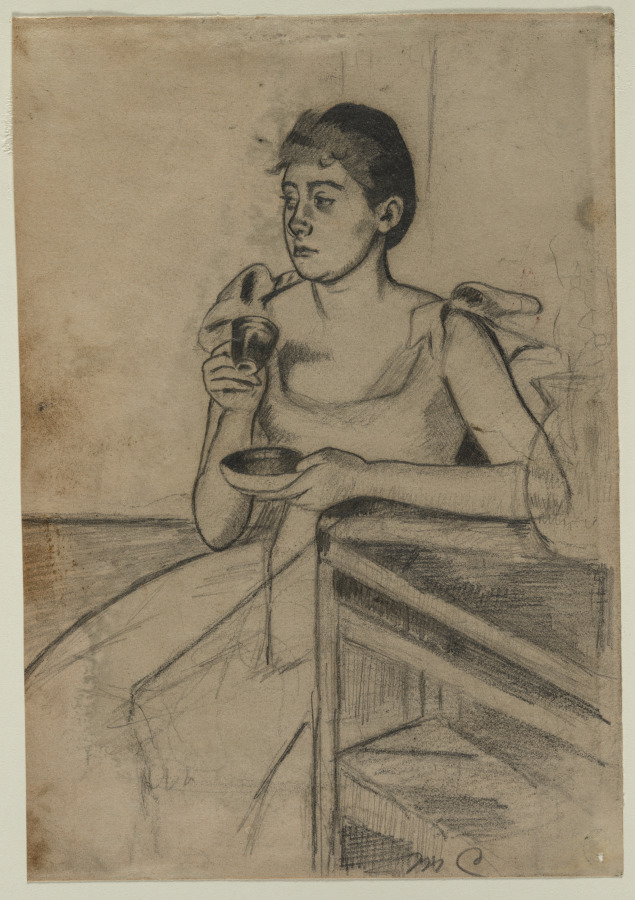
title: After-Dinner Coffee (recto)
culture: America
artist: Mary Cassatt (American, 1844–1926)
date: c. 1889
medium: graphite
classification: Drawing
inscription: inscribed in grahite, lower right: "M. C."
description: Cassatt exhibited prints for the first time in 1880 at the fifth Impressionist exhibition. As the decade progressed, she continued to show her graphic work alongside pastels and paintings. In the spring of 1890, at the Deuxième Exposition de Peintres-Graveurs, she showed a group of drypoints, remarkable in their delicacy and precision, as well as a group of prints made with a combination of aquatint and softground etching that appeared quickly drawn and spontaneous. After-Dinner Coffee is a study for a softground etching with aquatint.